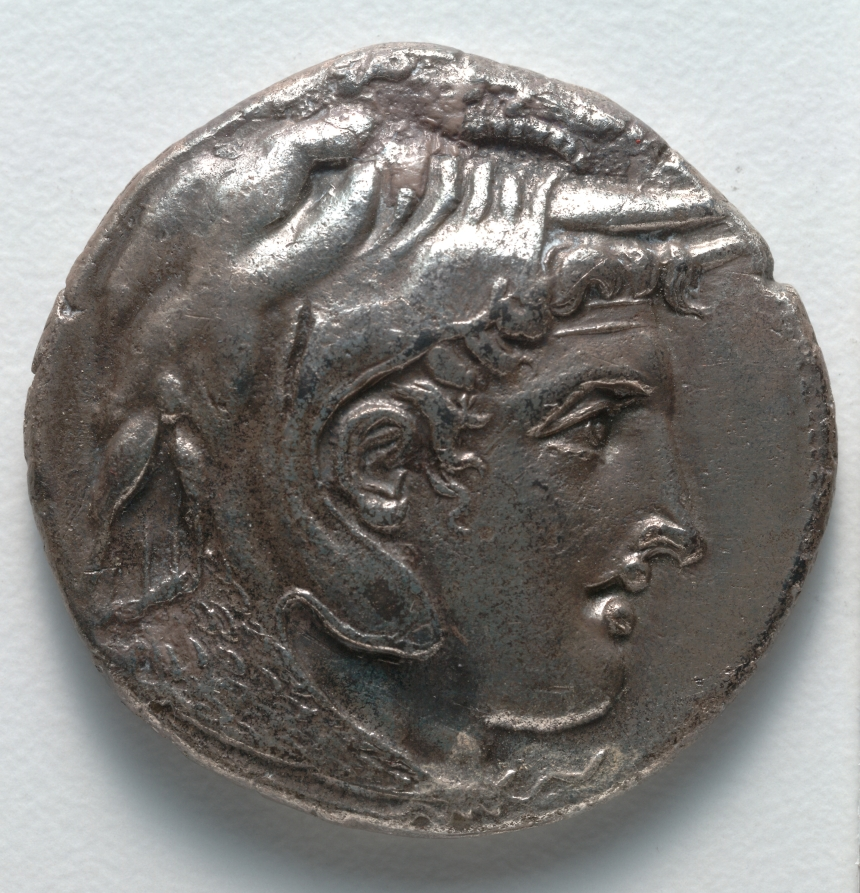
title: Tetradrachm: Head of Alexander III [The Great] (obverse)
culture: Egypt, Greco-Roman period (332 BCE–395 CE), reign of Ptolemy I (303–282 BCE), minted at Alexandria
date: 306 BCE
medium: silver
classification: Coins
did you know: The image of Alexander the Great in an elephant headdress references his Eastern conquests.